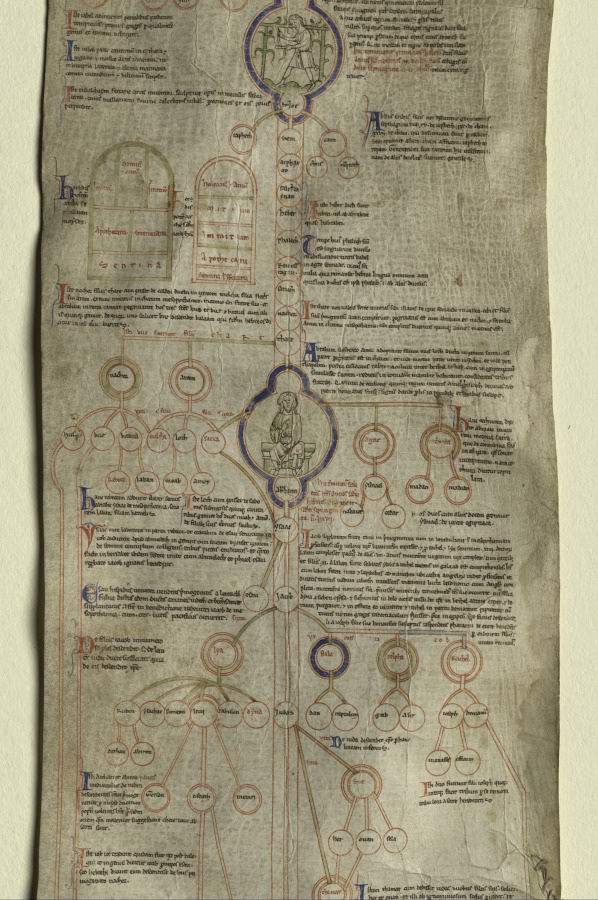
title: Peter of Poitiers's "Compendium Historiae in Genealogia Christi"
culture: England, Canterbury, 13th century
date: c. 1220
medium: ink and tempera on a vellum roll of four membranes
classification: Manuscript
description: This manuscript roll, composed of four membranes formerly stitched together in a continuous roll about nine feet long, has been divided in the middle for easier visibility and study. The text is an abridgment of biblical history focused on the descent of Christ from Adam. It was written by Peter of Poitiers (about 1130–1205), who taught theology and history in Paris and was widely copied. The present roll is an English copy of Peter's text made shortly after his death. Although manuscript rolls were hung on the walls of a classroom as instructional aids to students, some of them have value beyond their textual and historical interest because of the fine quality of their drawings, as seen here. A comparison with Canterbury manuscripts and stained glass of around 1220 is the basis for the attribution to Canterbury. Peter of Poitiers's aim in this project was to assist students prevented from mastering biblical history because of its length and because they were too poor to own books. His text on roll is the briefest possible summary of biblical history. It is arranged in six historical stages, denoting the six ages of the world, as decreed by theological tradition. The first five ages were inaugurated by Old Testament individuals: Adam, Noah, Abraham, David, and Sedecias. The birth of Christ heralded the sixth stage. Beginning at the top of the first membrane, the text consists of brief biographical entries on the ancestors of Christ (Adam, Noah, Abraham, Moses, and David) and other biblical personalities. These extend to the birth of Christ on the fourth membrane, ending with accounts of Hebrew and Roman kings and the Apostles. Each compendium shows the names of the ancestors inscribed within circles, those of direct descent placed vertically in a central column, others scattered in clusters to the right and left. The decoration of the roll consists of a series of medallions of diverse geometrical frames filled with either a figural drawing or a diagram. The style of these pen-and-ink drawings, some illuminated in tempera or tinted with wash, stems from English manuscript and glass painting attributed to the school of Canterbury Cathedral. The style of the museum's illustrations is so close to the stained glass panels made for Trinity Chapel at Canterbury (about 1220) to suggest that an artist active as a glazier in the Cathedral workshop may also have executed the manuscript. In the least, the painter of the roll manuscript was familiar with the style of the painted glass, and on this basis, a date of about 1220 seems appropriate. Additional evidence is supplied by a psalter illuminated at Canterbury shortly before 1220. The figurative scenes in this psalter were apparently illustrated by the same hand that executed the line and wash drawings in the museum's roll.